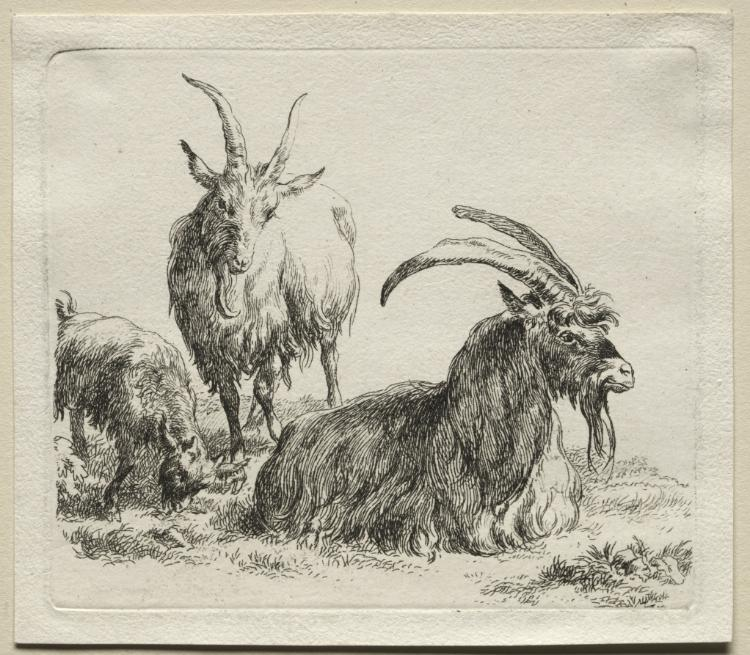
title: Animalia: Three Goats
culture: Netherlands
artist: Nicolaes Berchem (Dutch, 1620–1683)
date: 1635–83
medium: etching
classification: Print